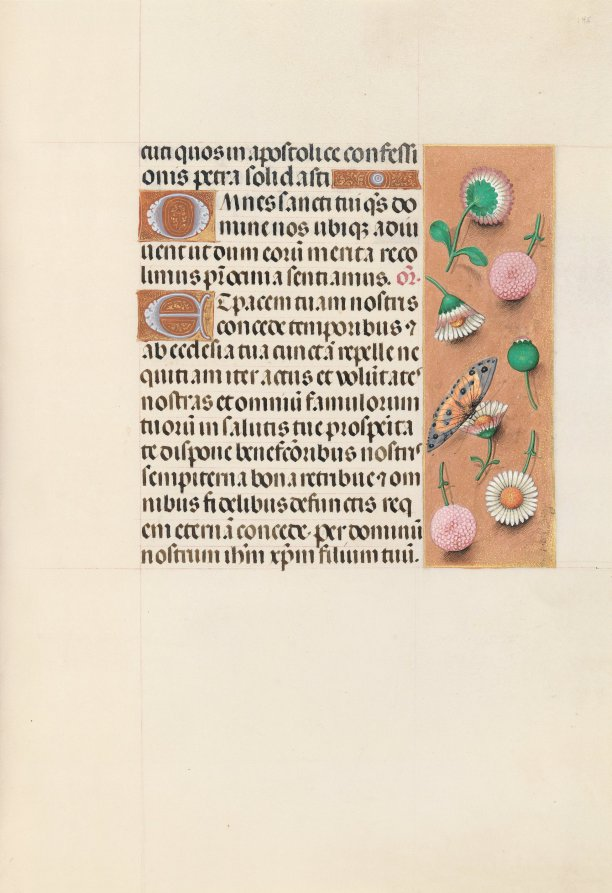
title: Hours of Queen Isabella the Catholic, Queen of Spain: Fol. 145r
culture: Flanders, Ghent and Bruges, late 15th century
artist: Master of the First Prayerbook of Maximillian (Flemish, c. 1444–1519)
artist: and Associates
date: c. 1500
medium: ink, tempera, and gold on vellum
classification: Bound Volume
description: This manuscript was illuminated by a circle of at least five highly organized manuscript painters active in the Flemish cities of Ghent and Bruges. The principal illuminator was Alexander Bening, who painted the majority of the book's miniatures. Manuscripts produced by this circle of artists are renowned for the decoration of their borders, which typically feature a rich variety of realistically-painted flowers, birds, and butterflies. This prayer book, called a book of hours, was intended not for a cleric, but for the private devotions of a lay person-in this case, Isabella the Catholic, Queen of Spain (1451-1504). Isabella's coat of arms embellishes the book's frontispiece. It is unlikely that the book was commissioned by the Queen herself; rather, she probably received it as a diplomatic gift from someone courting her patronage, perhaps Cardinal Francisco Jimenez de Cisneros. A Franciscan friar, Jimenez was dependent upon Isabella for his advancement, first to the post of Queen's confessor in 1492, and then to Archbishop of Toledo in 1495.